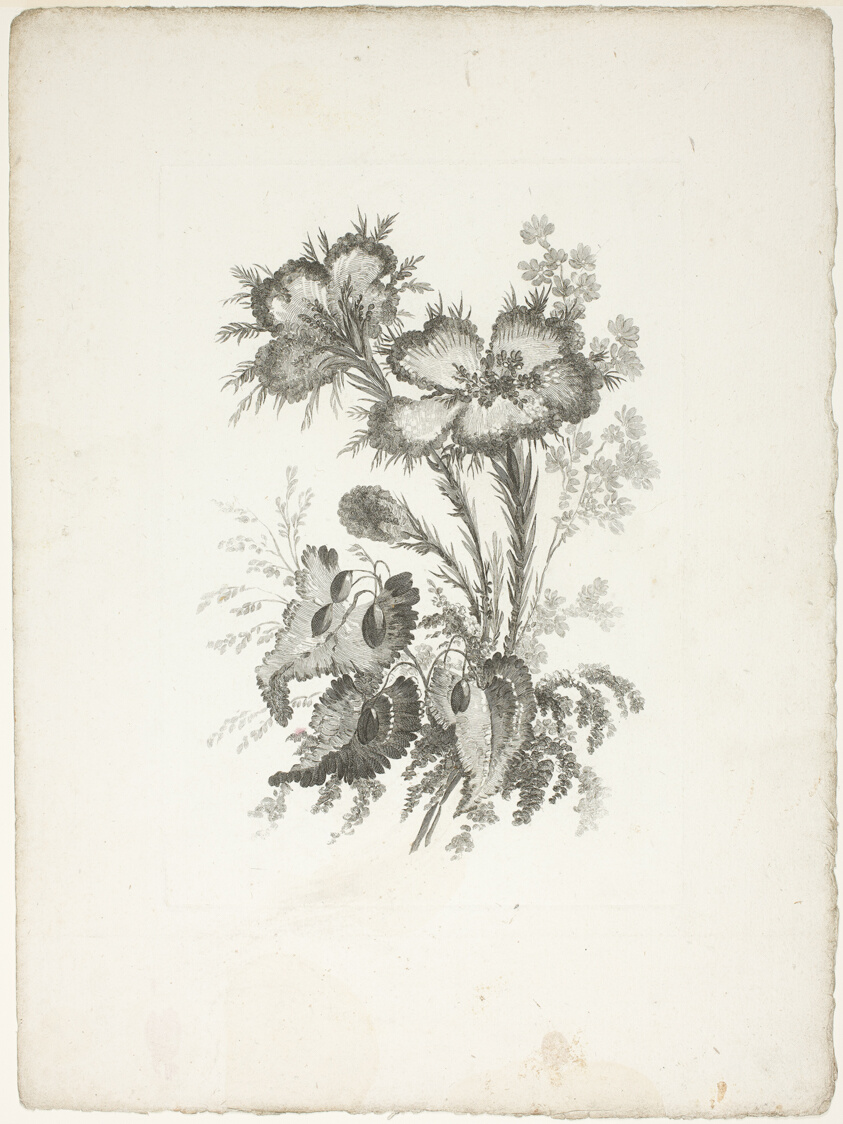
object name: Print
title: Bouquet, from Collection of New Flowers of Taste for the Manufacture of Persian Cloth, Invented and Drawn by Jean Pillement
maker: Johann Heinrich Hess (Germany, born 1746); after Jean-Baptiste Pillement (French, 1728-1808); published by Charles Leviez (French, 1708-1778)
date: 1765/70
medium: Etching on ivory laid paper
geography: Germany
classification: etching; print; prints and drawing